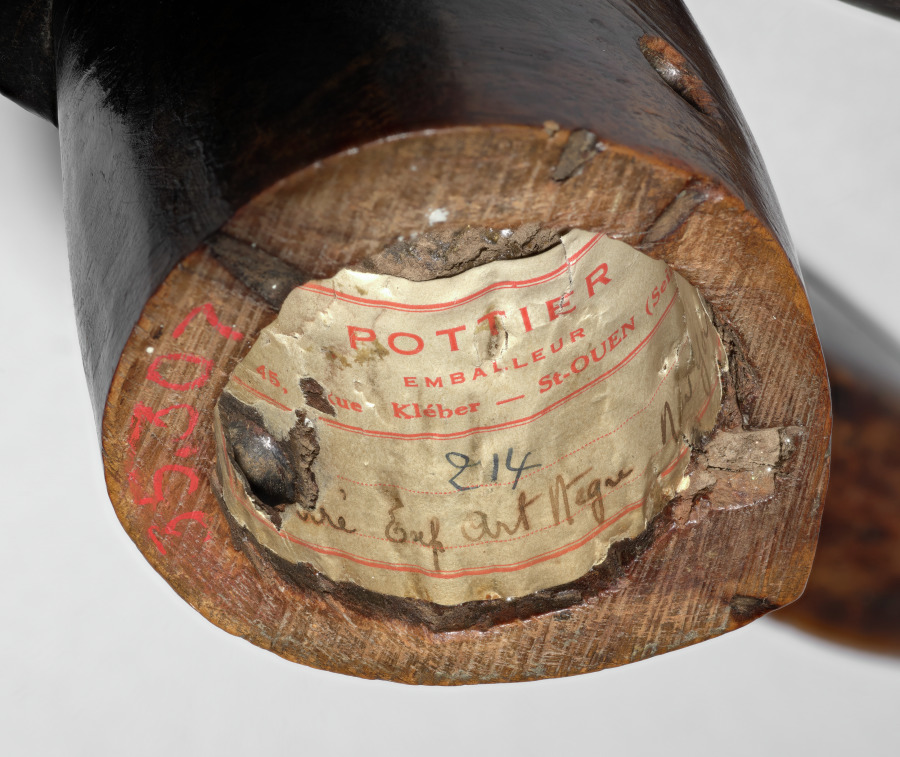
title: Head of a Hobbyhorse (korèdugaso)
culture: Africa, West Africa, Mali, Bamana blacksmith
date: late 1800s–early 1900s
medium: Wood and iron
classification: Sculpture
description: Pertaining to the male initiation society called Korè, this sculpture from the Koulikoro region represents the head of an aardvark and is part of a wooden hobbyhorse that is mounted by a ritual buffoon. The Korè initiates are divided into different classes, each having a designated mask. The ritual buffoons appear in pantomimes on different public occasions and poke fun at village authorities and other high-ranking individuals.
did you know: This is one of the best-known examples of a korèdugaso. It was featured on the catalogue cover for a 1935 exhibition at the Museum of Modern Art, one of the first on African arts in the US. It traveled to the CMA that same year.